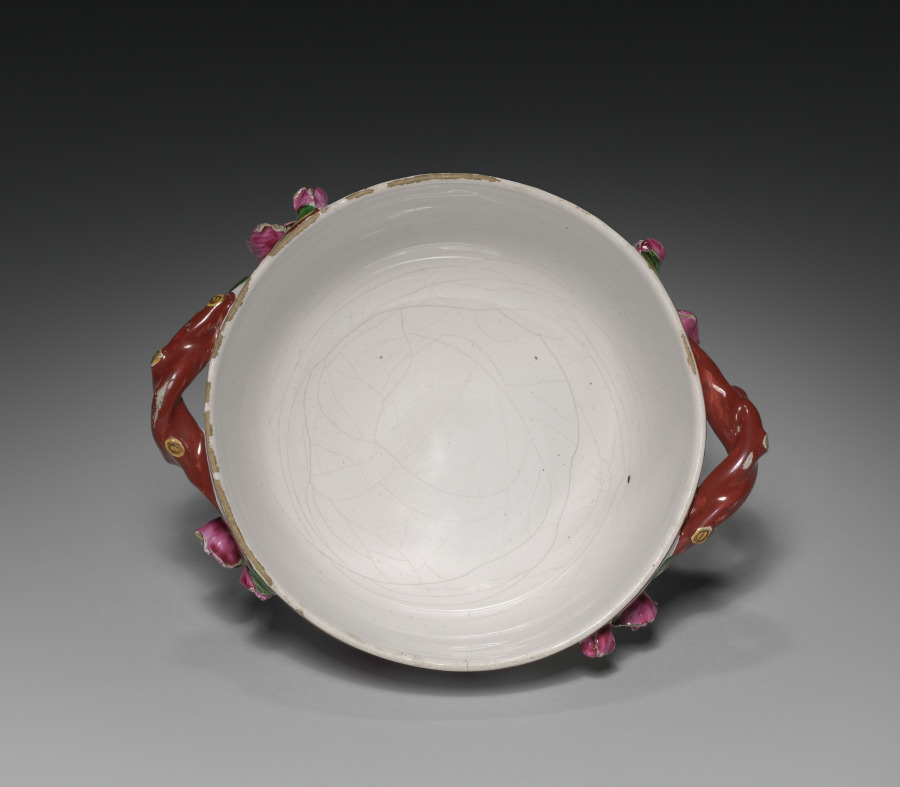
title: Bowl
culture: France, 18th century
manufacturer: Saint-Clément Factory (French)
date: c. 1775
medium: tin-glazed earthenware (faience) with enamel decoration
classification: Ceramic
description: The faience factory at Saint-Clément in eastern France closely imitated the styles and techniques employed by the Hannong's at Strasbourg. The monochrome landscapes in red on this covered bowl demonstrate the influence of German, in this case Meissen, porcelain on the faience made in this part of France.